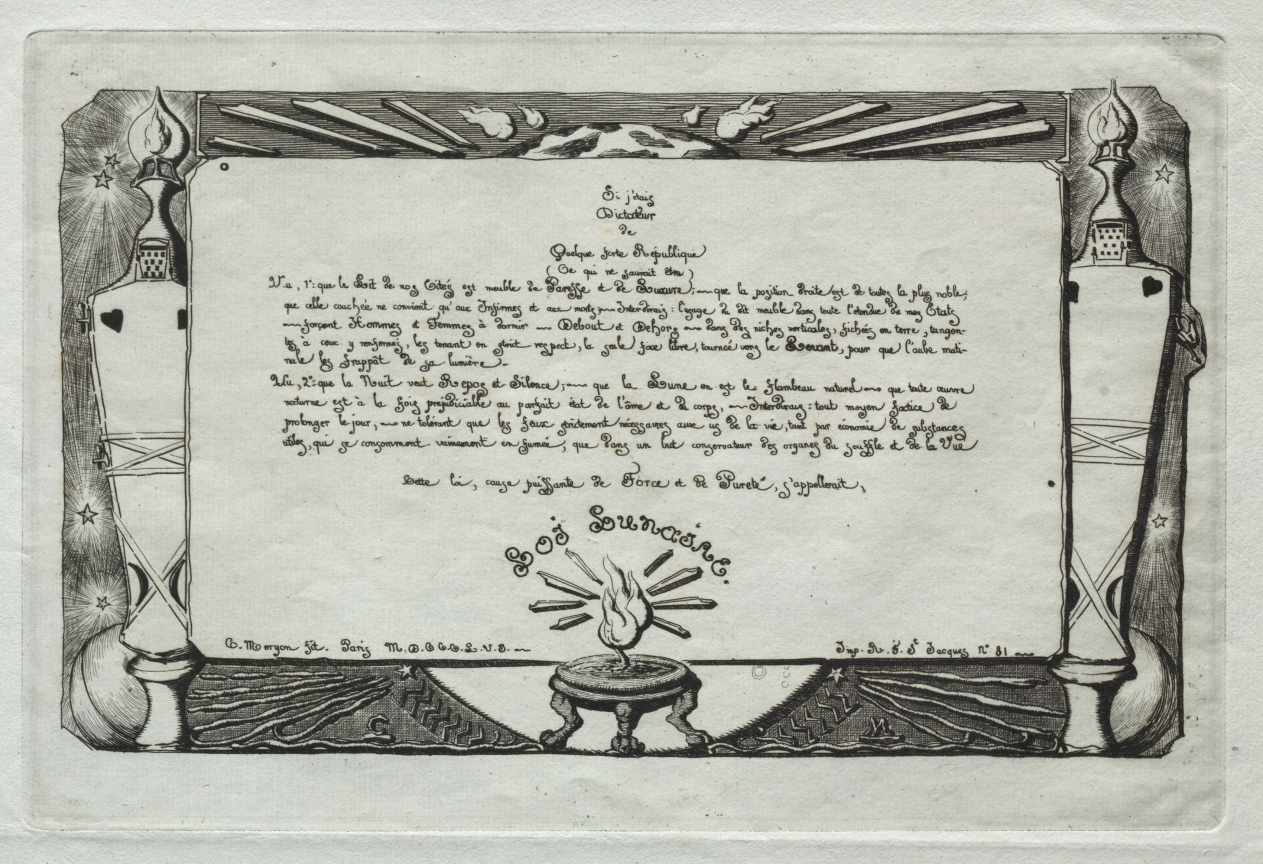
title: La Loi Lunaire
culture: France, 19th century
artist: Edmond Gosselin (French)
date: c. 1881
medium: etching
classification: Print